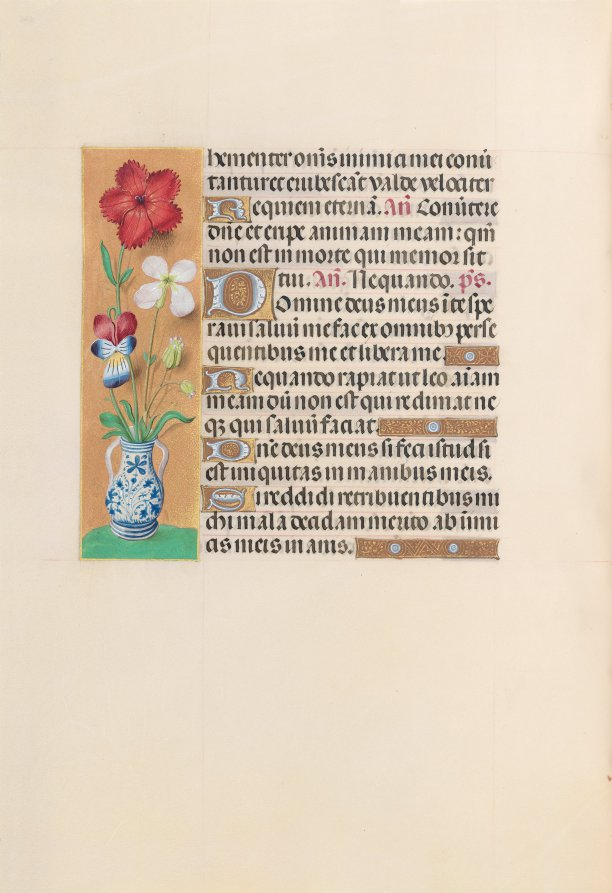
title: Hours of Queen Isabella the Catholic, Queen of Spain: Fol. 229v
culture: Flanders, Ghent and Bruges, late 15th century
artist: Master of the First Prayerbook of Maximillian (Flemish, c. 1444–1519)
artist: and Associates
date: c. 1500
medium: ink, tempera, and gold on vellum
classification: Bound Volume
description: This manuscript was illuminated by a circle of at least five highly organized manuscript painters active in the Flemish cities of Ghent and Bruges. The principal illuminator was Alexander Bening, who painted the majority of the book's miniatures. Manuscripts produced by this circle of artists are renowned for the decoration of their borders, which typically feature a rich variety of realistically-painted flowers, birds, and butterflies. This prayer book, called a book of hours, was intended not for a cleric, but for the private devotions of a lay person-in this case, Isabella the Catholic, Queen of Spain (1451-1504). Isabella's coat of arms embellishes the book's frontispiece. It is unlikely that the book was commissioned by the Queen herself; rather, she probably received it as a diplomatic gift from someone courting her patronage, perhaps Cardinal Francisco Jimenez de Cisneros. A Franciscan friar, Jimenez was dependent upon Isabella for his advancement, first to the post of Queen's confessor in 1492, and then to Archbishop of Toledo in 1495.